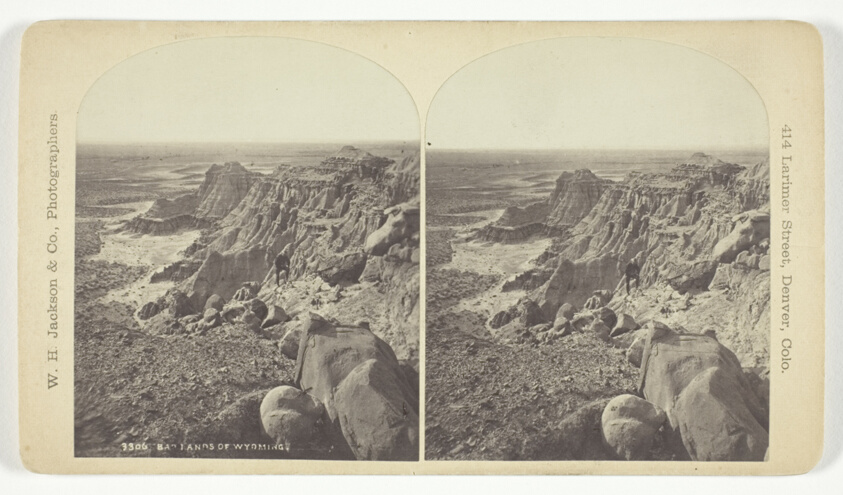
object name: Photograph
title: Badlands of Wyoming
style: 19th century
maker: William Henry Jackson (American, 1843–1942)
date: 1879/92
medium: Albumen print, stereo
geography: United States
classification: stereograph (albumen); albumen silver print; photographic process; photography; photograph